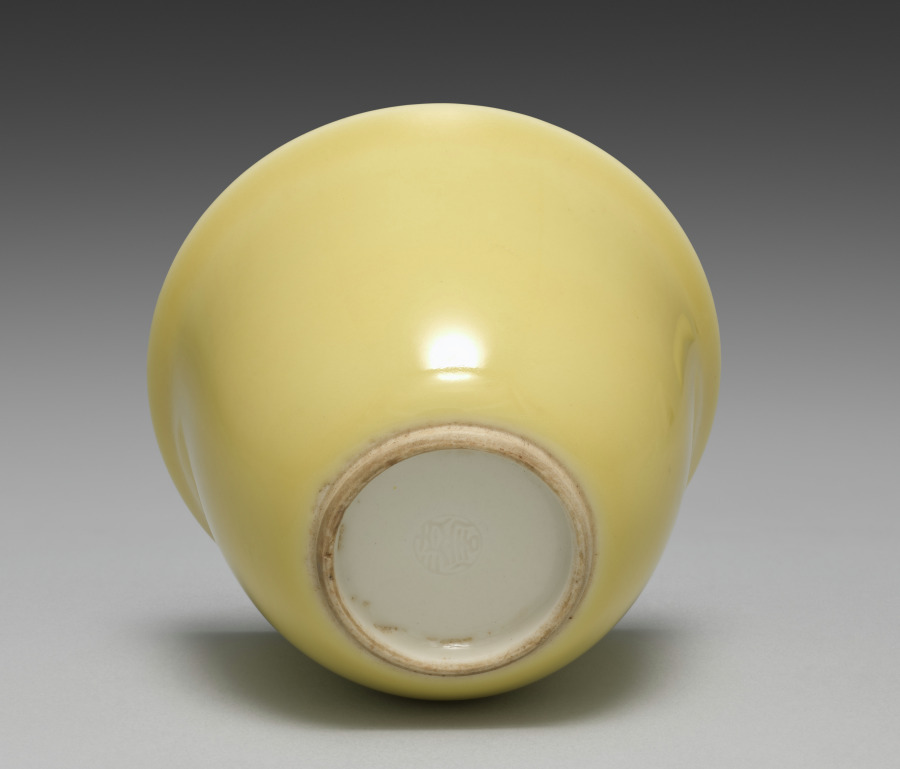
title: Cup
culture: Japan, Taishō period (1912–26) or Shōwa period (1926–89)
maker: Seifū Yohei IV (Japanese, 1872–1951)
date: 1914–46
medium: porcelain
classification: Ceramic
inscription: 清風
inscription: 清風造 【印】成山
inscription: 清風盧人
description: Like his father, Yohei IV also produced works with red or yellow monochrome glazes. His yellow-glazed works include this set of five drinking cups, a pair of sake pourers CMA 2022.216, and a sweets bowl molded into the shape of a chrysanthemum CMA 2022.218.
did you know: Seifū Yohei IV learned the ceramics industry from his father and painting from Tanomura Shosai.